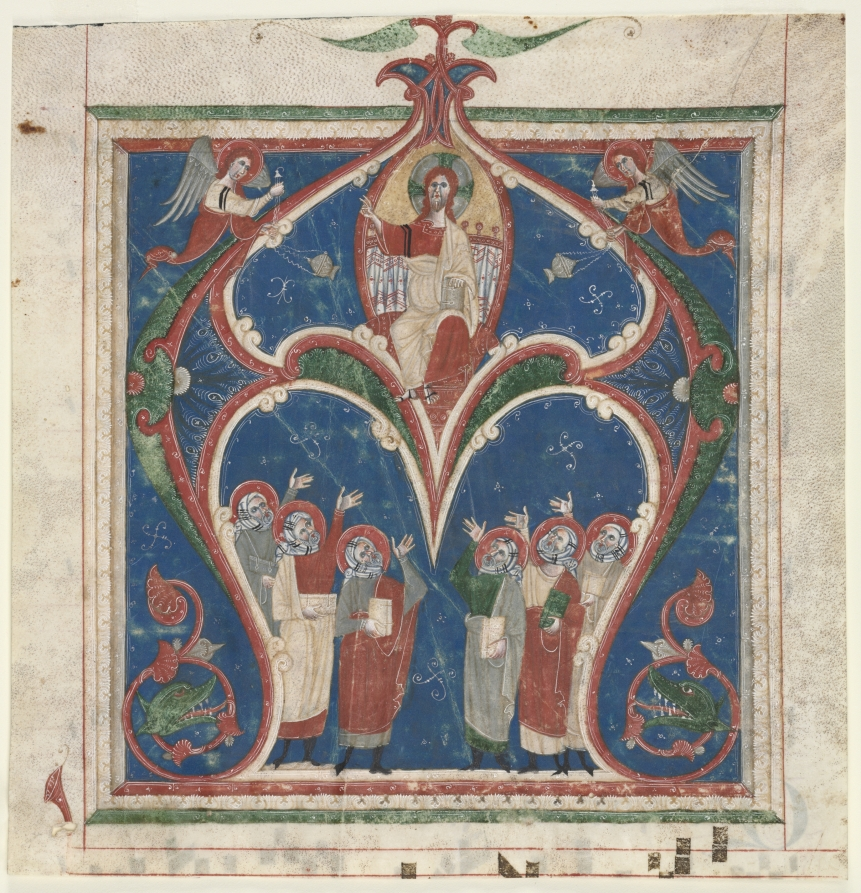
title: Historiated Initial (A) Excised from an Antiphonary: Christ in Majesty with Prophets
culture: Central Italy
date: c. 1280–1300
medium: ink, tempera, and gold on parchment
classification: Manuscript